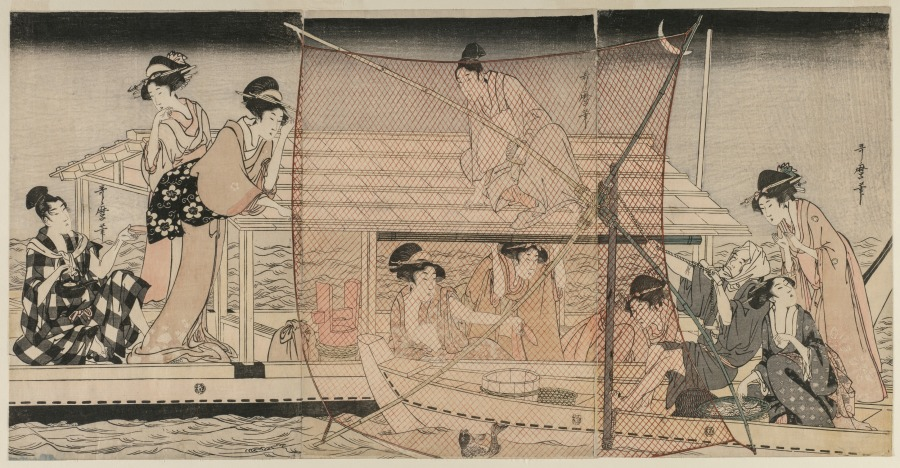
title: Net Fishing at Night on the Sumida River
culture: Japan, Edo period (1615–1868)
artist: Kitagawa Utamaro (Japanese, c. 1754–1806)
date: c. 1800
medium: Triptych of color woodblock prints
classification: Print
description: In this triptych (a composition of three prints), a nighttime drinking party on a pleasure boat is interrupted by an encounter with a fishing boat on the Sumida River in Edo (now Tokyo). A young man in a bold, checked robe distributes lacquer dishes of sake to his female companions, while another man sits on the boat’s roof, peering at the fisherman’s net. The fisherman struggles to control the net as a woman in the party boat offers her sake dish, her robe pulled open at the neck to enjoy the evening cool.